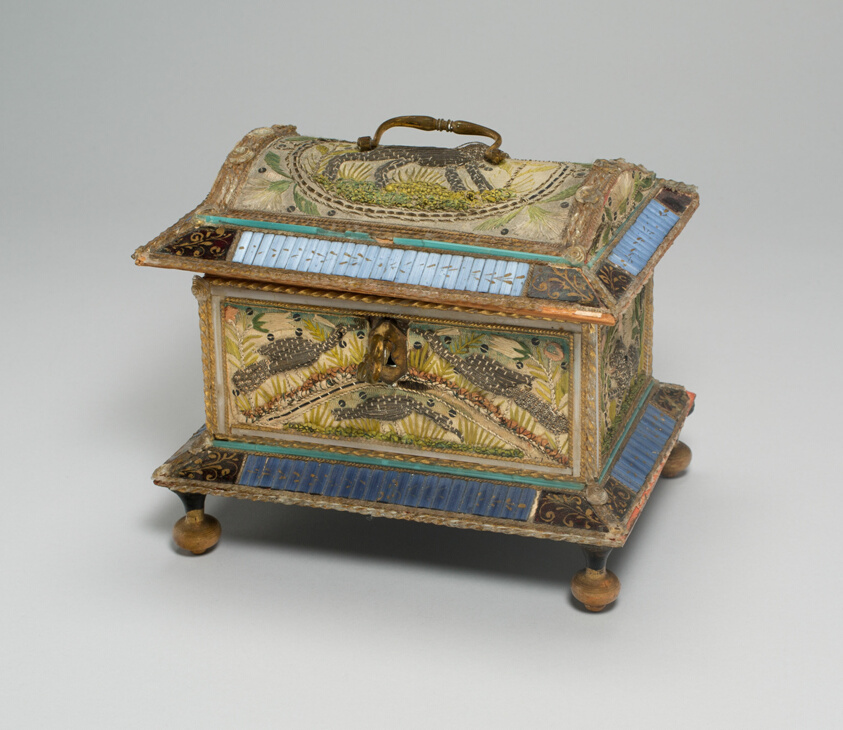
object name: Decorative Arts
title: Casket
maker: Nevers, France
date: Late 17th century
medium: Wood, silk, embroidery, verre de Nevers, metal, and gilding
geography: Nevers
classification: needlework (visual works); decorative arts